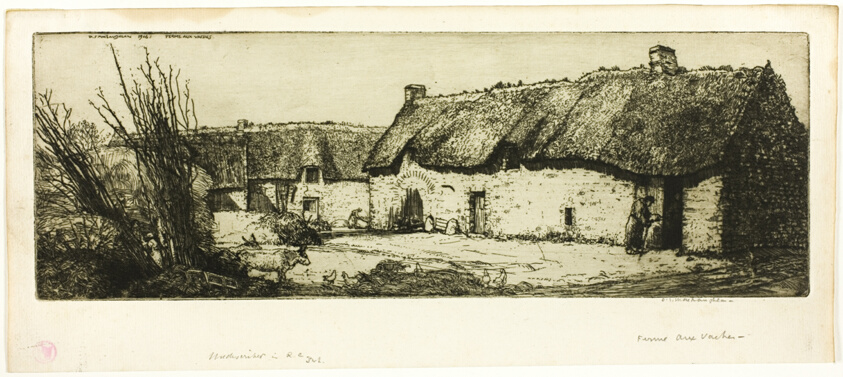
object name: Print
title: Ferme Aux Vaches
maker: Donald Shaw MacLaughlan (American, born Canada, 1876-1938)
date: 1906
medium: Etching in black on ivory laid paper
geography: United States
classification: etching; print; prints and drawing